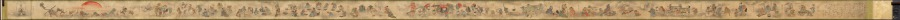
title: An Illustrated Marriage of Apparitions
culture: Japan, Edo period (1615–1868)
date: mid-1800s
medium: handscroll; ink and color on paper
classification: Painting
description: The matchmaking, engagement, wedding, and birth of the first child of two apparitions, or bakemono, literally "things that change," are illustrated in this whimsical, humorous handscroll. Japanese folklore abounds with such strange creatures, most famously represented in handscrolls featuring a procession of 100 supernatural monsters. Aside from a textual preface and cartouches indicating the content of the scenes, the tale is told visually. The artist and whereabouts of the original handscroll are unknown, but a number of other 19th-century copies by amateur painters exist in Japanese collections, attesting to its broad appeal.